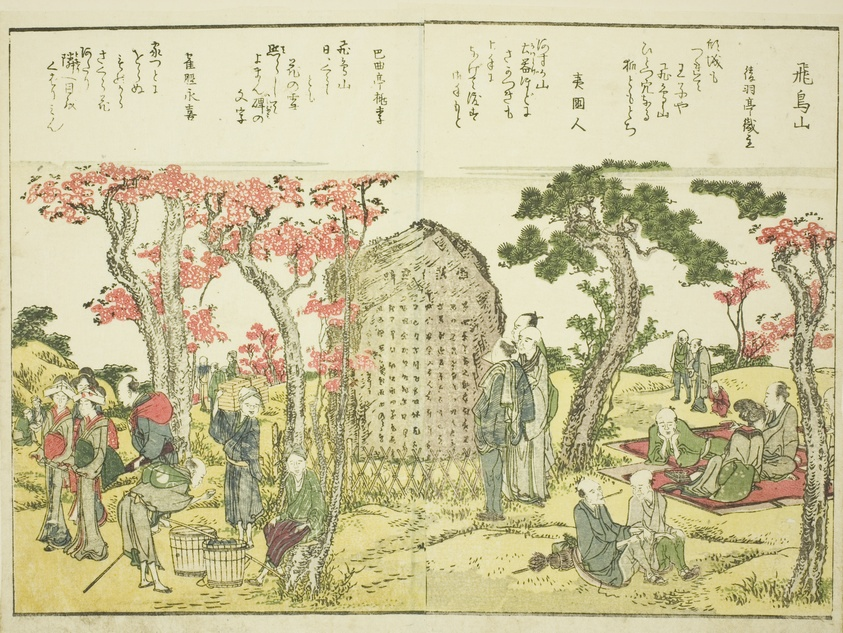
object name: Print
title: Asuka Hill (Asukayama), from vol. 1 of the illustrated book "Fine Views of the Eastern Capital at a Glance (Toto shokei ichiran)"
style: Japanese (culture or style)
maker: Katsushika Hokusai 葛飾 北斎; Japanese, 1760-1849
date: 1800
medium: Color woodblock print; double-page illustration from book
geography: Japan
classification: woodblock print; print; asian art